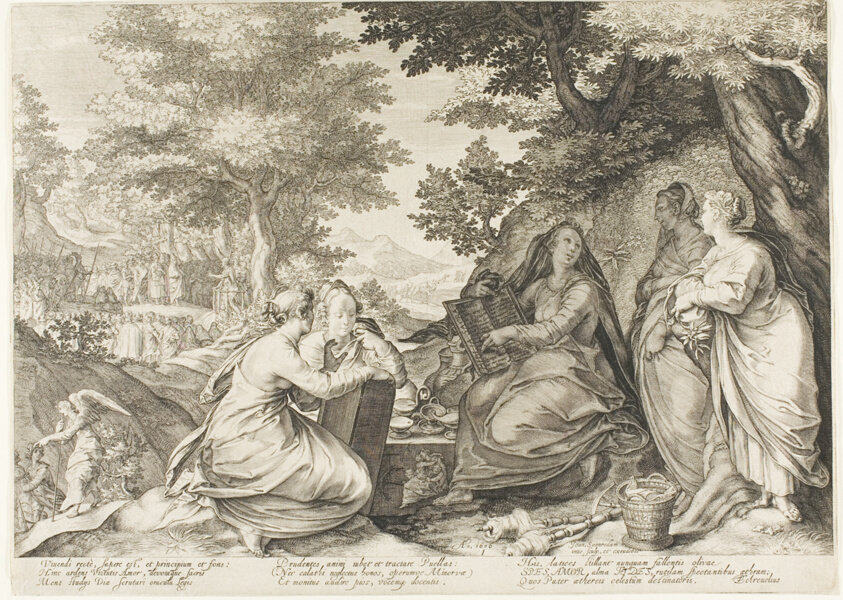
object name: Print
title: Plate One, from Five Wise and Five Foolish Virgins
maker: Jan Saenredam (Dutch, 1565-1607)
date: 1606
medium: Engraving on paper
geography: Netherlands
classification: engraving; print; prints and drawing